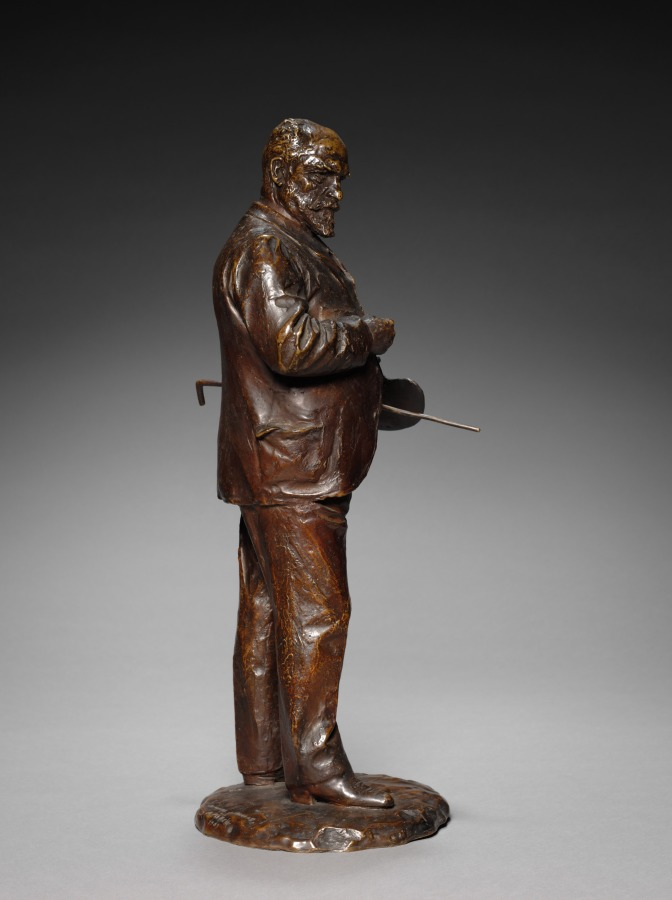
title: Standing Figure of Léon Bonnat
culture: France, 20th century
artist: Denys Pierre Puech (French, 1854–1942)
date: 1903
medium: bronze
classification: Sculpture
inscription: Signed and dated: "1903"; inscribed: "au maitre L. Bonnat"